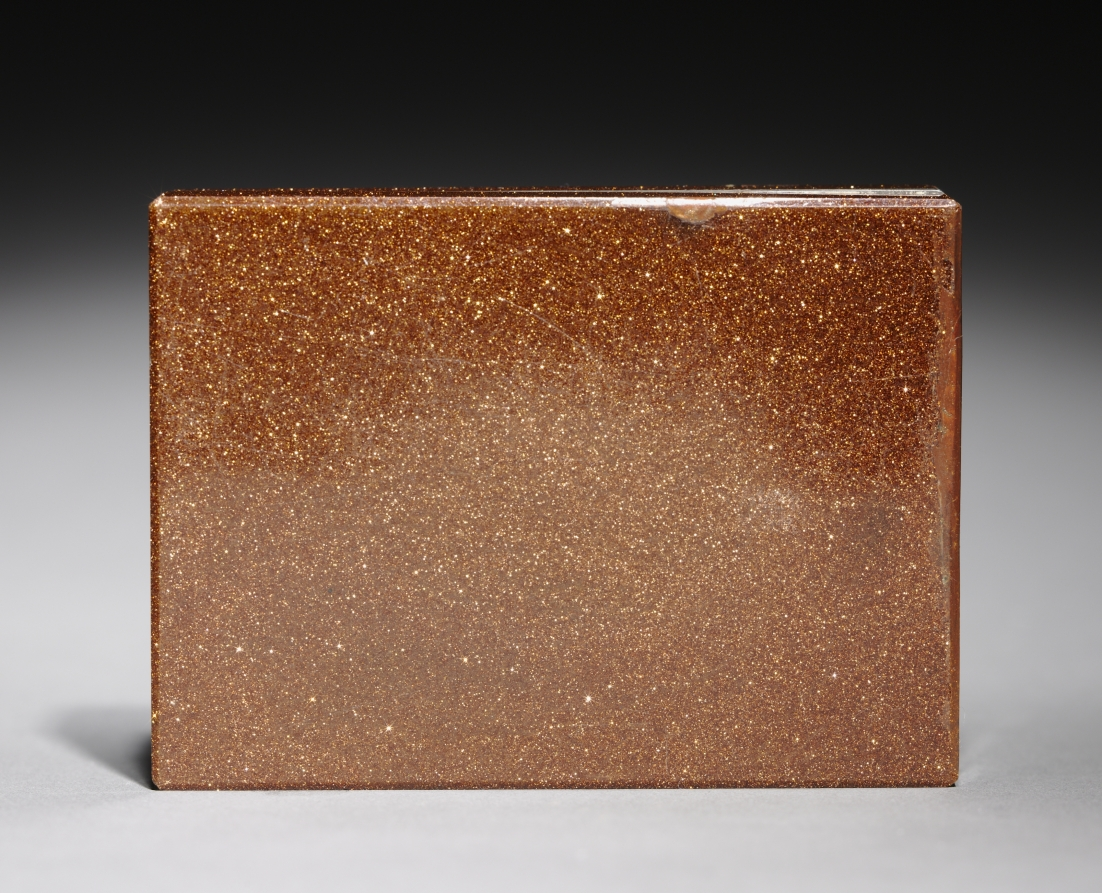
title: Snuff Box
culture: Italy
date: 1860–70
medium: goldstone, gold, micro mosaic glass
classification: Enamel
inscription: no marks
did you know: Hundreds of small glass tesserae make up the central image on the cover of this snuff box.